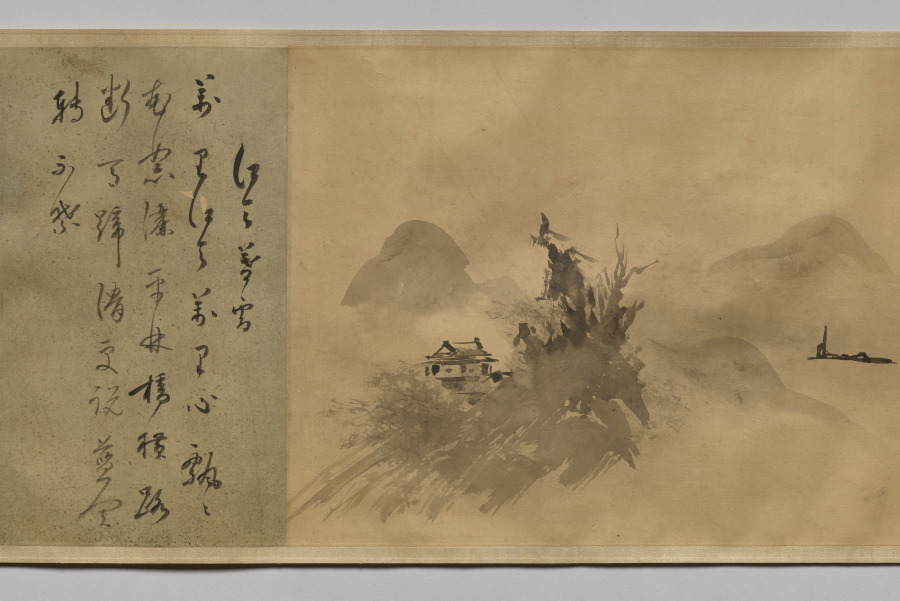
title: Poems and Pictures of the Eight Views of Xiao-Xiang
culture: Japan, Momoyama period (1573–1615)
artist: Unkoku Tōgan (Japanese, 1547–1618)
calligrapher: Inkei Gentetsu (Japanese, 1562–1612)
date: 1605–12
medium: Handscroll; ink on paper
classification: Painting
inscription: Each painting sealed with red gourd-shaped seal reading Unkoku (雲谷) and a square seal reading Tōgan (等顔).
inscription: Each painting prefaced with a titled poem on the Eight Views of Xiao-Xiang by Yujian Ruofen (active late 13th century) inscribed by Japanese Buddhist monk Inkei Gentetsu (1562–1612).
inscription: 右寫玉㵎之筆勢／雪舟末葉等顔筆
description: Unkoku Tōgan brushed these scenes using the splashed-ink technique associated in Japan with the Chinese monk Yujian Ruofen (active late 1200s). Xiao-Xiang refers to the region in present-day Hunan province, where the Xiang River and its tributaries converge. Each of the eight views evokes a time of day or season. The earliest surviving series of Xiao-Xiang paintings is by Wang Hong (active mid-1100s), but textual evidence tells us the theme appears earlier. It was later adopted in Japan and Korea, as seen here. The poems were inscribed by Inkei Gentetsu, the third abbot of the Rinzai Zen temple Tōshunji, Japan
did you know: The “Tō” of Tōgan comes from the name of painter Sesshū Tōyō (1420–1506).